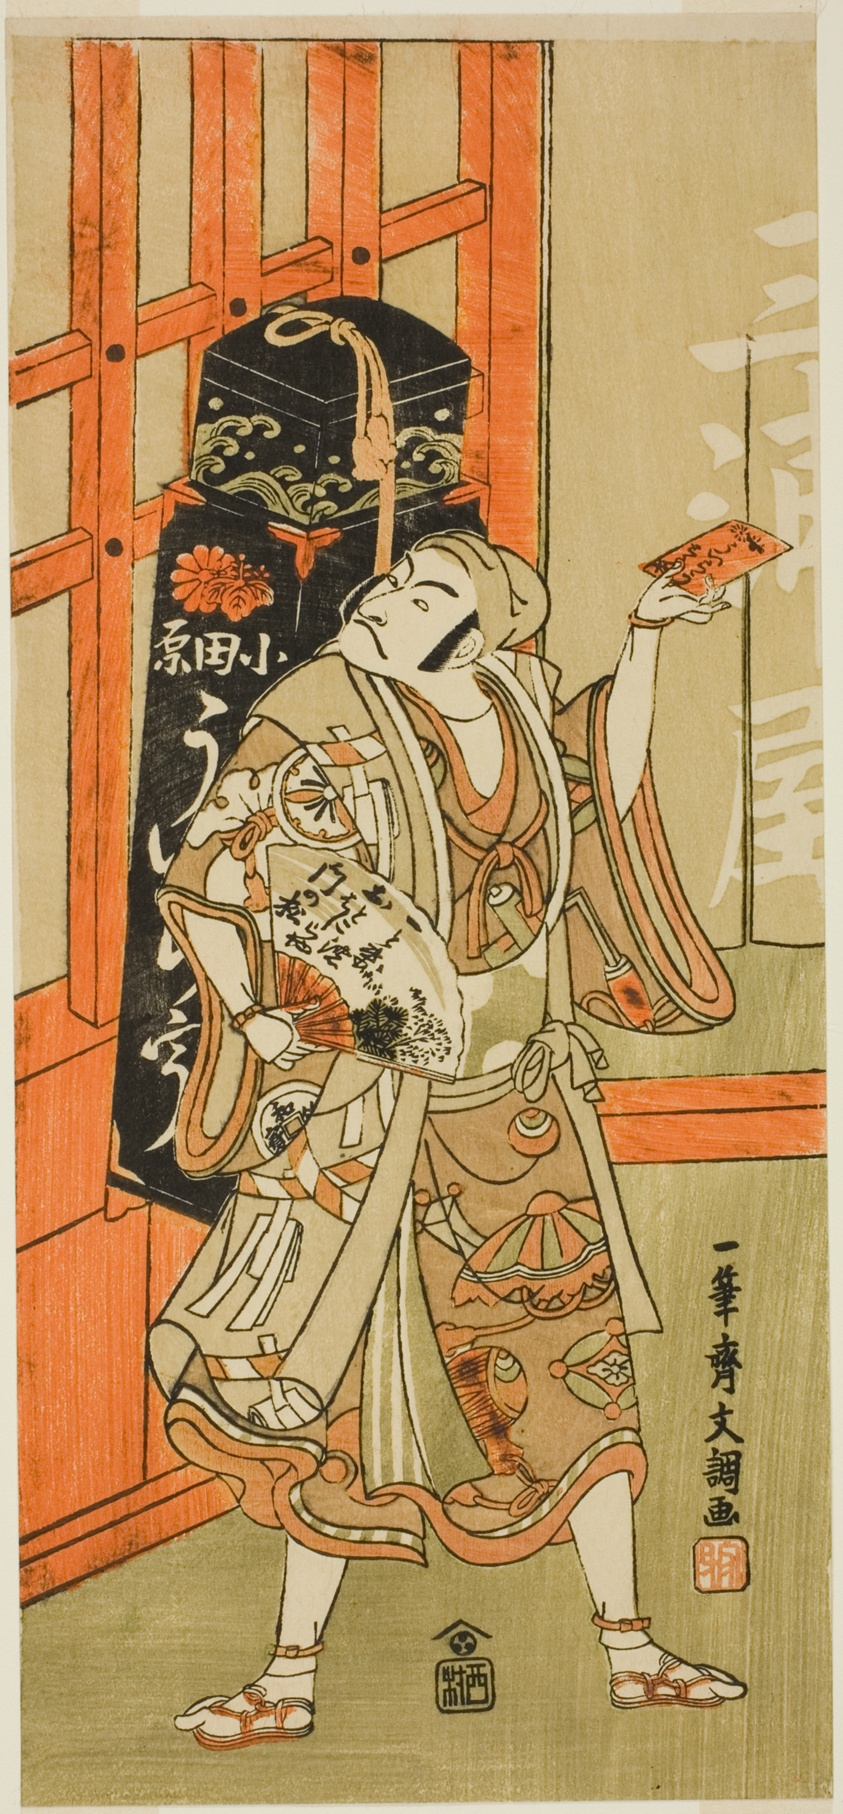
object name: Print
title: The Actor Matsumoto Koshiro III as Kyo no Jiro Disguised as an Uiro (Panacea) Peddler from the Play Kagami-ga-ike Omokage Soga, Performed at the Nakamura Theater in the First Month, 1770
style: Japanese (culture or style)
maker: Ippitsusai Buncho (Japanese, active c. 1755-90)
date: c. 1770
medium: Color woodblock print; hosoban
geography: Japan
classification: woodblock print; print; asian art